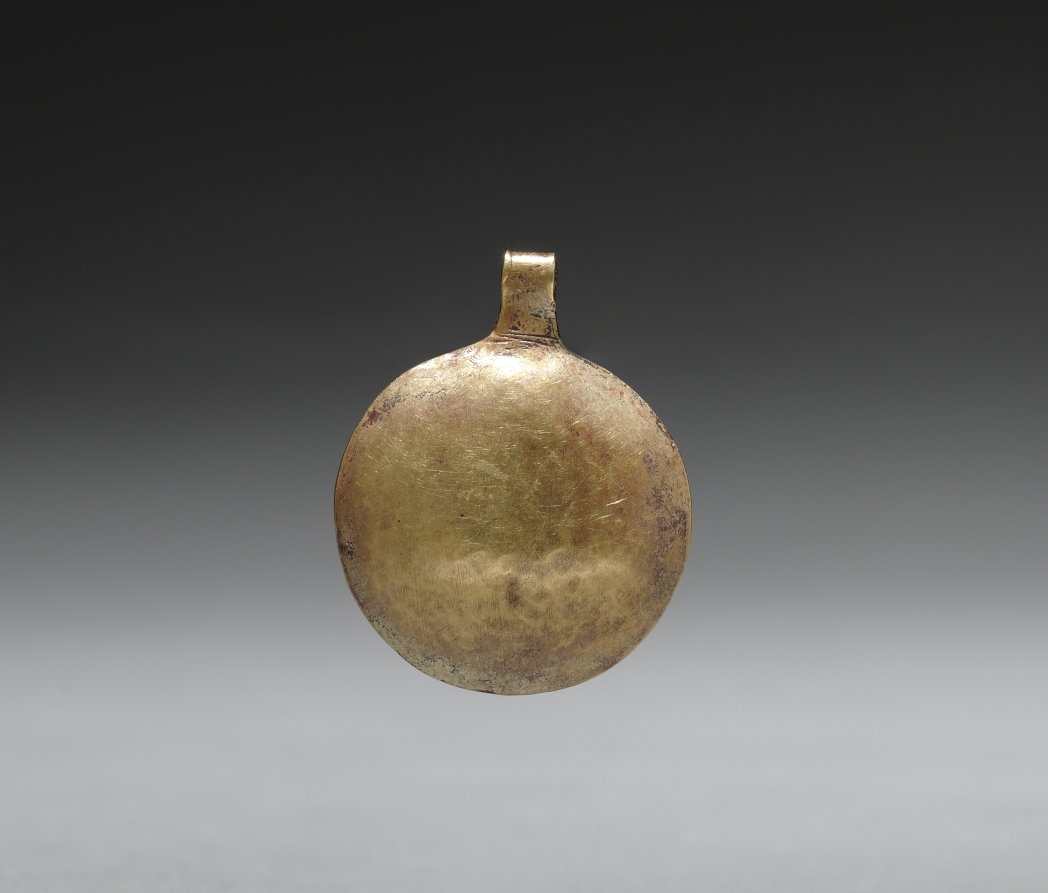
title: Tweezer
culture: Peru, North Highlands, Chavín de Huantar(?), Chavín style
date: c. 500–200 BCE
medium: hammered and cut gold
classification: Metalwork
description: There seems to be a link between Chavín religion and appearance of the Andes’ first large precious-metal objects, made using revolutionary new metallurgical processes. Chavín may have developed these technical innovations to express the inexpressible, the "wholly other" nature of its religion. In many areas, elite men and women wore the ornaments as emblems of their ties to this religion, and eventually were buried with them. These 16 objects, along with three others not in the museum’s collection, are said to have come as a group from Chavín itself.